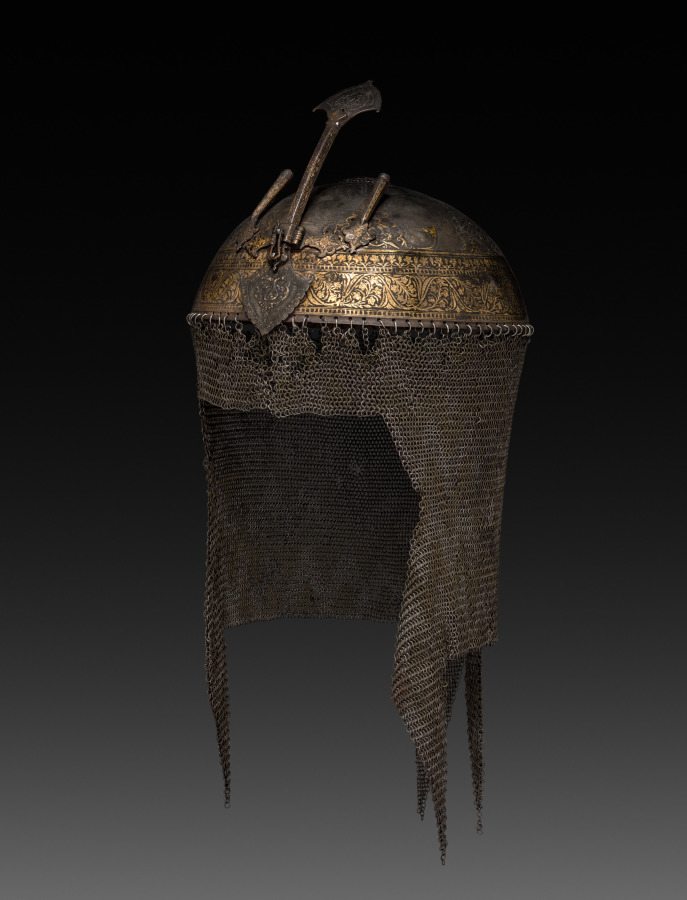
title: Helmet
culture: North India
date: 1600s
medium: steel with gold and brass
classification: Arms and Armor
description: Mughal soldiers wore hemispherical steel helmets to battle. This helmet’s surface features decorative floral patterns created using a process called damascening, in which gold wire was hammered into steel grooves. A leaf-shaped guard slides down in front of the nose for protection. The short tubes on either side of the nasal guard were for holding plumes, most popularly black heron feathers or white aigrettes. The spike that would have been on the apex has broken off. Also missing is the stuffed cotton padding that lined the interior. Chain mail made up of interlocking steel wire rings protected the ears, neck, and shoulders.